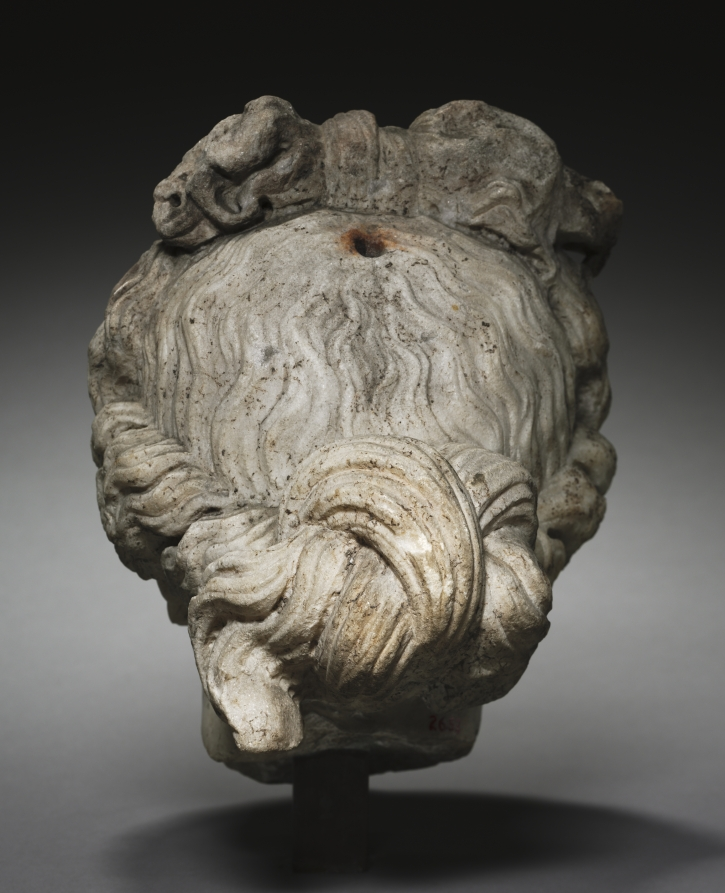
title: Head of Aphrodite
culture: Italy, Roman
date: 100–200 CE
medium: marble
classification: Sculpture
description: With idealized features including a straight nose, small mouth with thick lips, and a hairstyle best known from the so-called Capitoline Venus (now in Rome), this head likely belonged to a full-scale statue of the goddess of love. Like the Capitoline Venus and many other sculptures of the Roman period, it probably showed the goddess nude and bathing, harking back to the groundbreaking sculpture of Aphrodite at Knidos, carved by Praxiteles in the mid-fourth century BC.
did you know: The elaborate hairstyle, arranged in a bow atop the head, identifies this figure as Aphrodite.